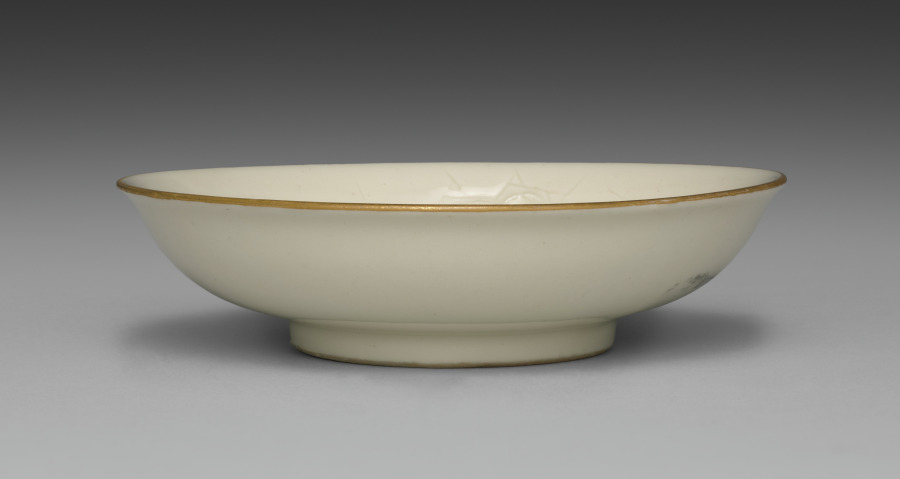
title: Small Dish from Dining Set with Plum Blossoms and Cracked-Ice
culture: Japan, Meiji period (1868–1912)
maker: Seifū Yohei II (Japanese, 1844–1878)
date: c. 1875–78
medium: Porcelain with molded designs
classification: Ceramic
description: Each item in this set has a delicate low-relief design of flowering plum branches over scattered, intersecting lines meant to resemble the cracked-ice surface of a frozen body of water and is signed on the base in gold pigment. While Yohei II produced many fine works in underglaze blue, like those produced by Kiyomizu Shichibei, he also made works in quite different styles later in his career, from the early 1870 s. In 1873, he was appointed purveyor to the Industrial Center of Kyoto Prefecture, a designation associated with Kyoto’s efforts to reach an international market through the port of Kobe; and from 1875 until his death, he was involved in national-level projects to present Japanese ceramics across the world. It was during this period that Yohei III was apprenticed to Yohei II, and it has been suggested that this set may in fact be an early example of Yohei III’s work, which he signed with his teacher’s name. Decorated with flowers resembling Japanese textile motifs, the set calls to mind the design of Yohei II’s pair of vases with plum blossoms in the Victoria and Albert Museum. Here, the elaborate trees created for a formal public exhibition setting have been translated into the approachable blossoms of the genteel domestic environment. While the designs are consistent across the pieces, each raised flower petal and pistil and each incised line in the ice was done by hand, so the cups, bowls, and dishes are similar yet unique. The bottoms of two boxes once identified the set’s owner, but the information has been deliberately obscured with black ink. However, inscriptions still visible appear to indicate two occasions, once at the end of July 1886 , and once again in June 1916 , when parts of the set were requested from Hokura in Niigata Prefecture. The location corresponds to a neighborhood in the present-day city of Jōetsu. The surname Tsuji 辻 also appears on a paper tag affixed to one of the box cloths. Future research may possibly reveal more about their provenance. A vase by Yohei III in a private collection combines the formal grandeur of the Yohei II vases in the Victoria and Albert Museum with the gentler design of this dining set, placing flowering plum trees against soft, scalloped-edge clouds resembling those in golden screens.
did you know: The dining wares have a creamy white coloration that the four boxes containing them identify as Korean in style.